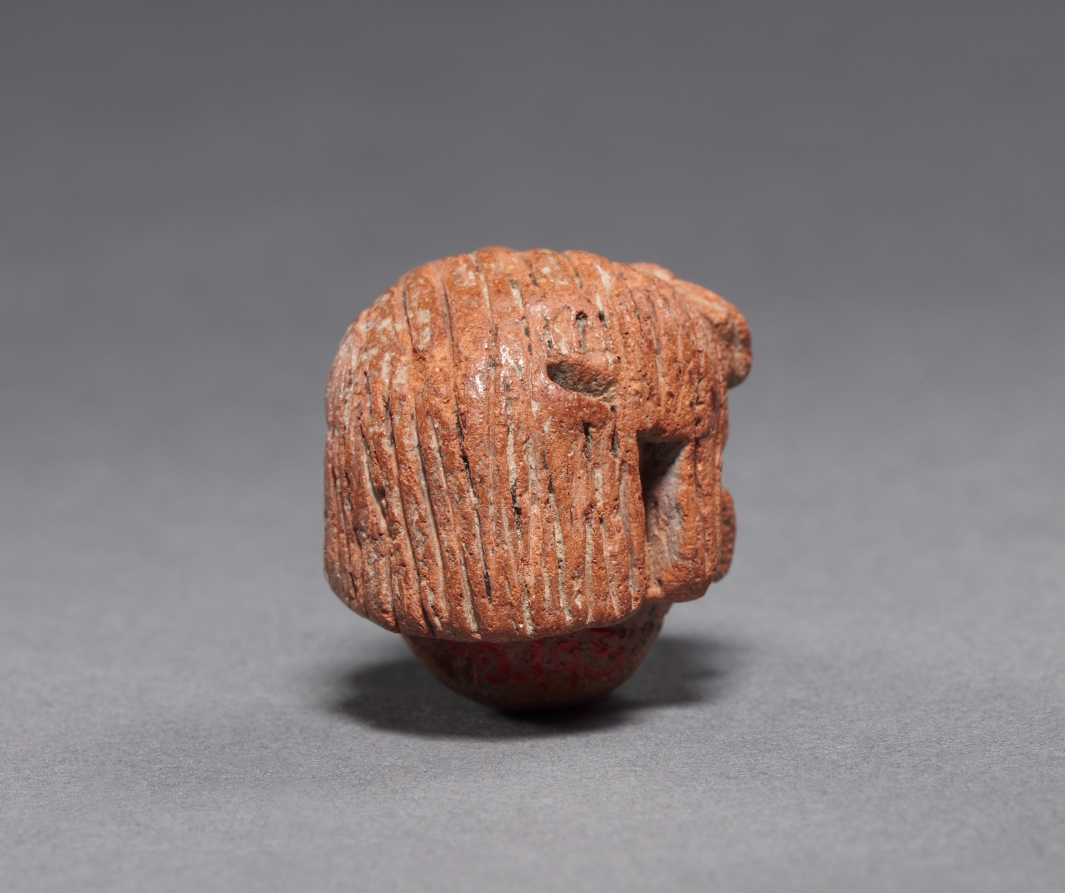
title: Head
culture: Mesoamerica, Pre-Columbian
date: before 1519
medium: clay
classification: Sculpture